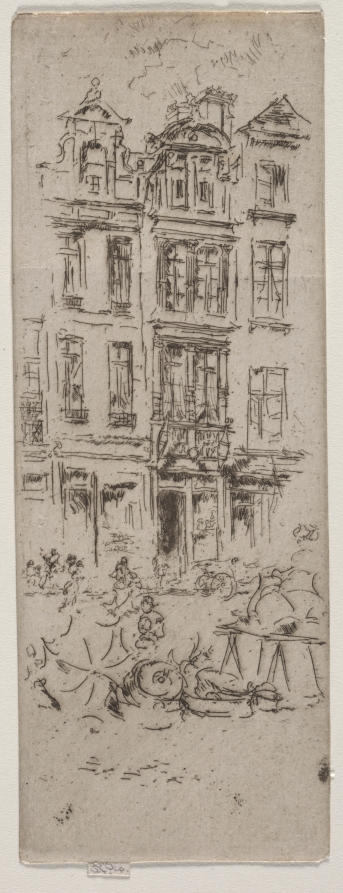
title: Flower Market, Brussels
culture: America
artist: James McNeill Whistler (American, 1834–1903)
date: 1887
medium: etching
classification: Print